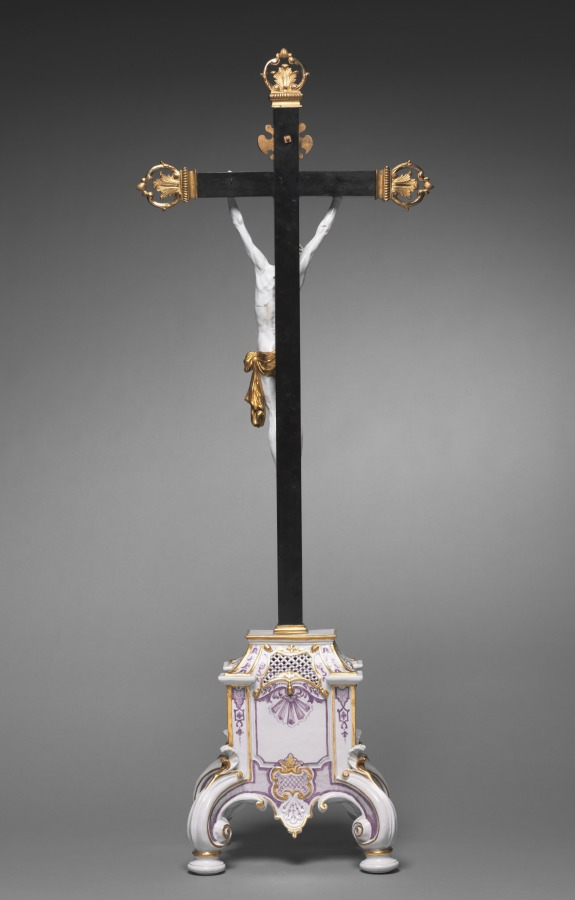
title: The Crucifixion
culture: Austria, Vienna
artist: Du Paquier Porcelain Manufactory (Austrian, active 1719–1864)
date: c. 1730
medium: porcelain, ebonized wood cross with gilt bronze mounts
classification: Ceramic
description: The second oldest European porcelain factory after that at Meissen (in Germany) was set up in Vienna in 1716. During its early years, the Vienna factory was privately owned by a court official, Claudius Innocentius Du Paquier, and its early wares—made before 1744—carry his name. They are characterized by energetic shapes, strong colors, and the use of gold for surface decoration. This is the only Du Paquier crucifix known today. The figure of Christ closely resembles the work of Vienna's most famous sculptor, Georg Raphael Donner (1693–1741), and was probably created by one of his followers especially to be used on this crucifix. The anatomical accuracy and precise detail of the figure, along with the abundance of gold decoration, indicate that the piece was probably a special commission intended for a distinguished patron, possibly a member of the Hungarian Esterházy family.